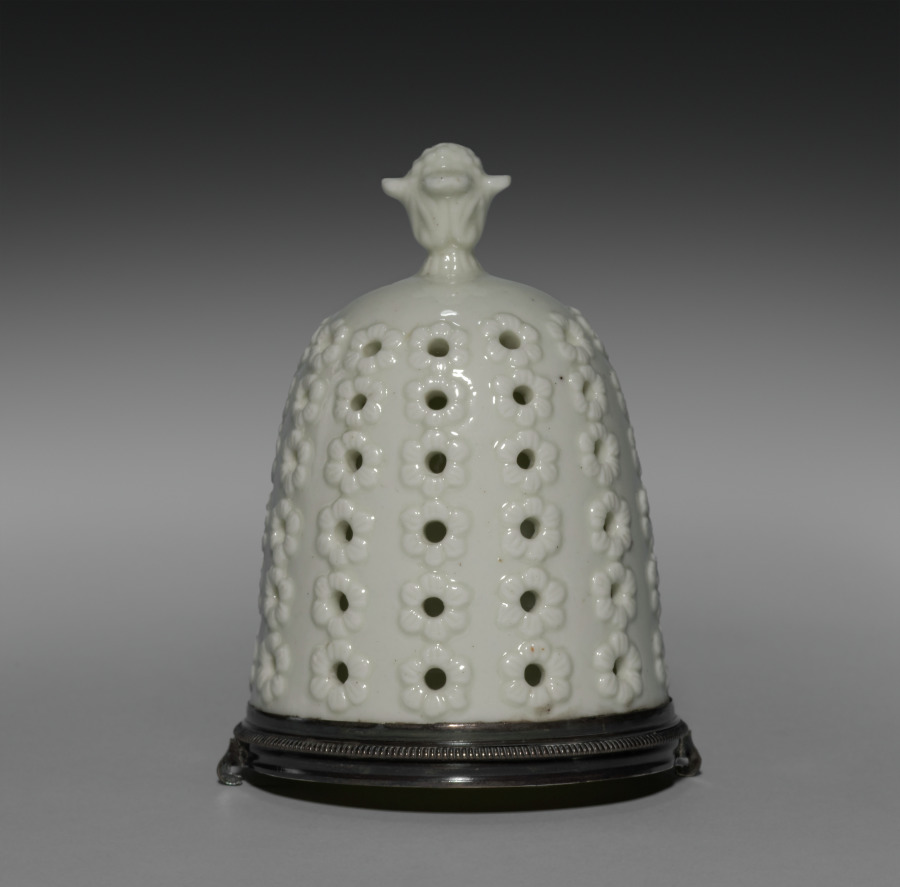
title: Sugar Caster (cover)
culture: France, Saint Cloud, 18th century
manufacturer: Saint Cloud Porcelain Factory (French)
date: c. 1732– 1738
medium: soft-paste porcelain, silver mount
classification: Ceramic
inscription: [Discharge mark of Hubert Louvet, 1732-1738 (Dog's head in profile), on both sections of silver mount]